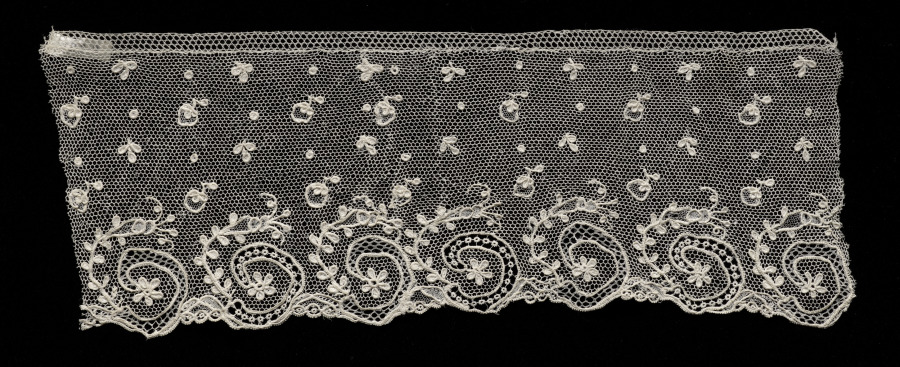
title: Lace Edging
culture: France, Alençon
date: 1700s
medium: Needle lace (Point d'Alençon)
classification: Lace